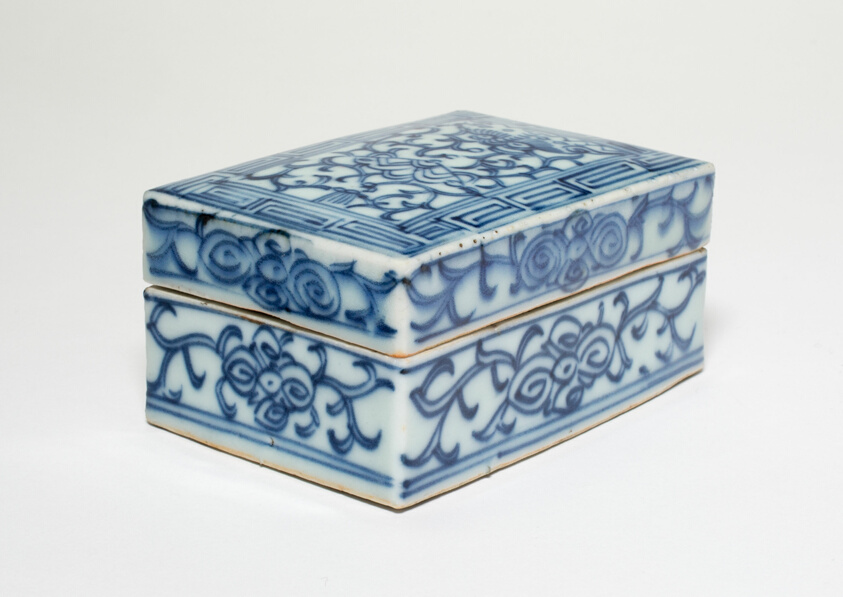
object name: Vessel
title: Blue-and-White Box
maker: China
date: Ming dynasty (1368-1644), 17th century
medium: Porcelain painted in underglaze blue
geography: China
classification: porcelain; asian art; ceramics